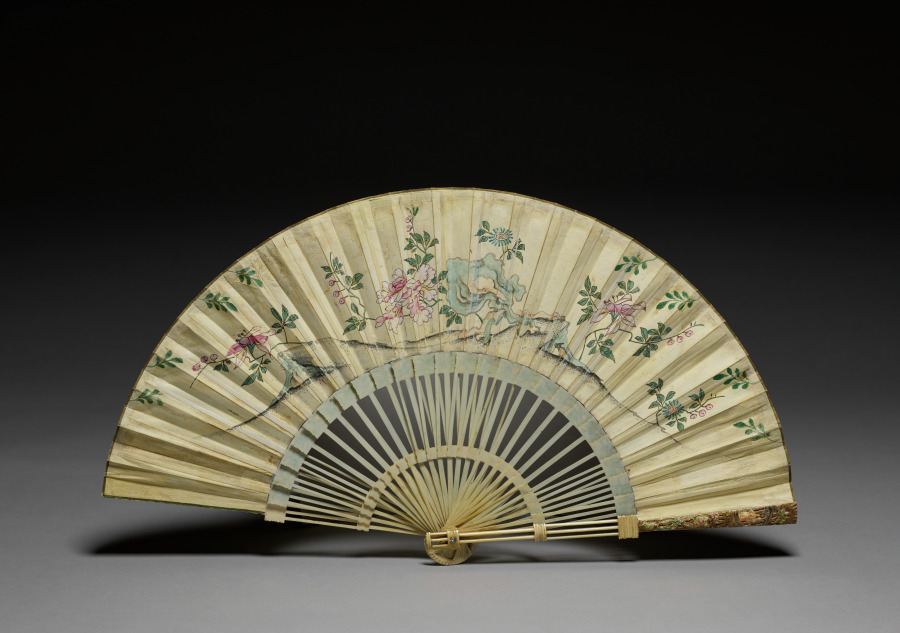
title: Folding Fan: A Children's Game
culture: Netherlands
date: c. 1760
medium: leaf: gouache on paper; frame: ivory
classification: Miscellaneous